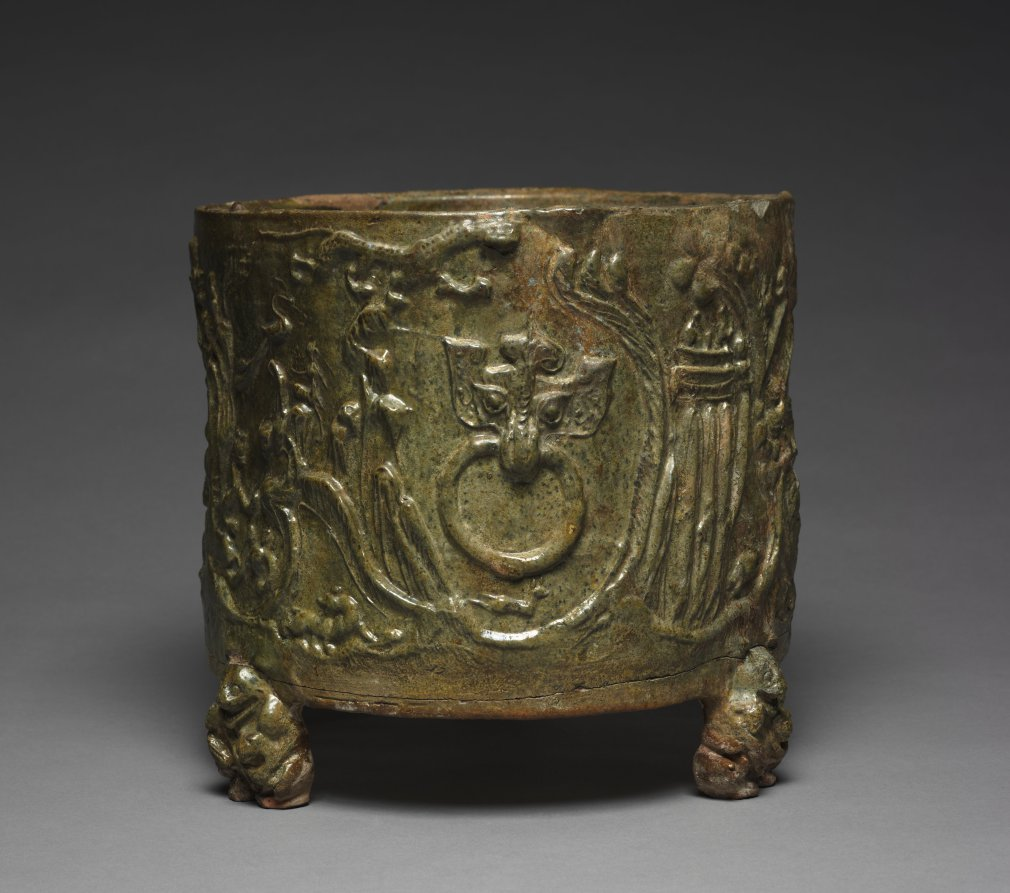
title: Cylindrical Jar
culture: China, Han dynasty (202 BCE–220 CE)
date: 202 BCE–220 CE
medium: lead glazed earthenware with molded relief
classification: Ceramic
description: Vessels like this often are call "hill jars" since many survive with conical covers shaped in rising peaks. "Squatting bear" feet and false animal-mask ring handles are common to the group. This cylinder has been molded in two relief bands depicting hills and three populated with a medley of real and imaginary creatures. Wispy human-like figures are associated with a popular cult of Taoism prevalent in China during the Han Dynasty. The scene may represent a paradise of immortality idealized by that cult and appropriate to this vessel's offering as a burial gift. When excavated from Han tombs, similar jars have been found to hold animal bones or powder; they may have served as food or cosmetic containers. Regardless of symbolism or function, this piece provides evidence for the appearance of early landscape lost in more fragile media.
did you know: The three feet are in the form of seated bears holding cubs.